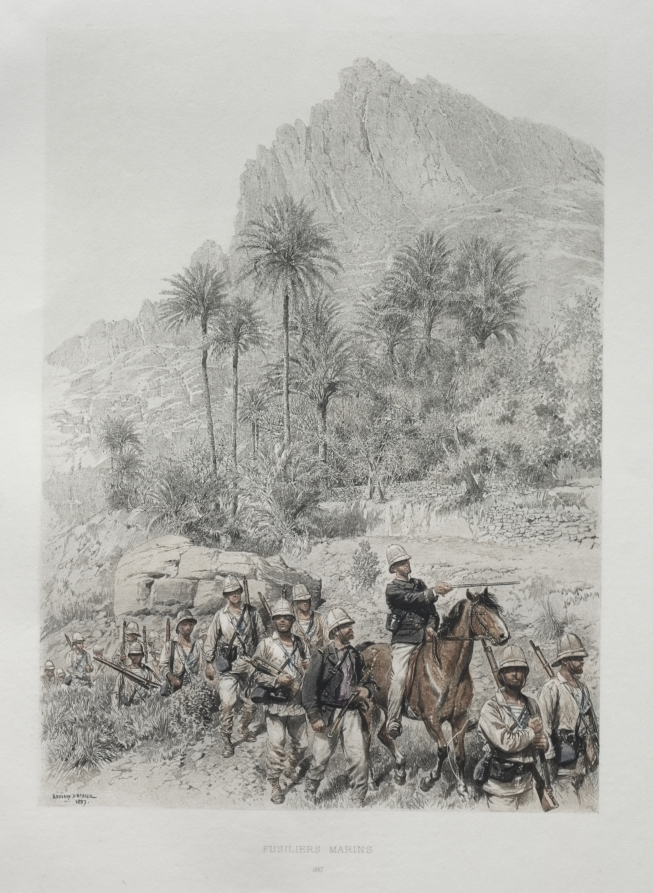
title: Riflemen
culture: France, 19th century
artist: Édouard Detaille (French, 1848–1912)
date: 1887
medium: color photogravure of drawing enhanced with roulette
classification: Print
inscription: in plate, lower left: E. Detaille